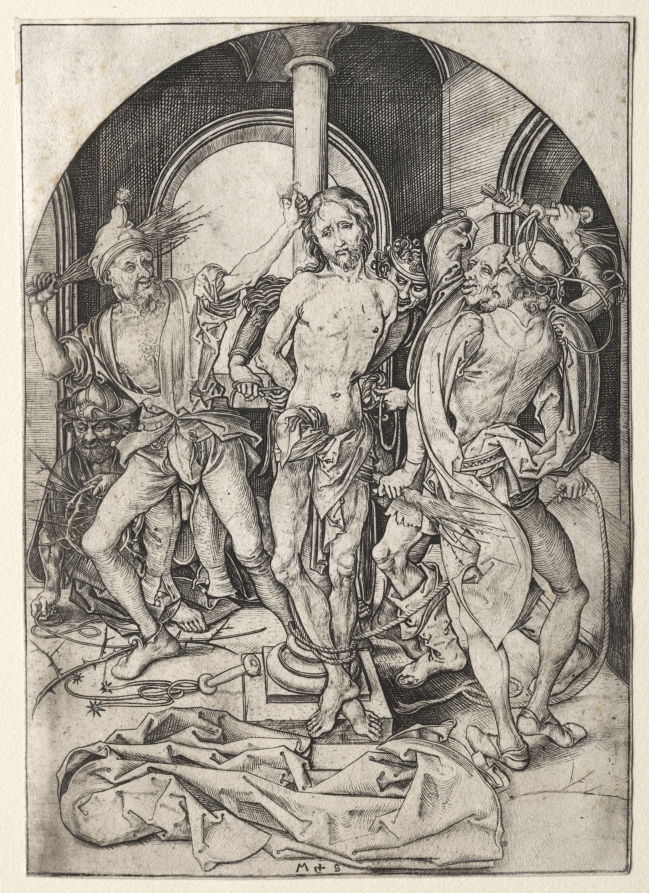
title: The Passion: The Flagellation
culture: Germany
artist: Martin Schongauer (German, c. 1450–1491)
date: c. 1480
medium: engraving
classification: Print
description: Martin Schongauer's series of the Passion of Christ was his largest set of engravings, made around 1480, and extensively copied across Europe. It consists of twelve prints detailing the suffering of Christ in the last days of his life. Schongauer's version focuses on crowded scenes, grotesque physiognomies of Christ's tormentors, and great pathos in the compositions. Here, Jesus is bound to the column by one persecutor while three others are about to flagellate him with a set of different scourges. A fourth, to the left, prepares the crown of thorns.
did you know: The assorted and detailed set of grisly scourges included in this scene was likely meant to elicit a deep meditation on Christ's physical suffering from the viewer.